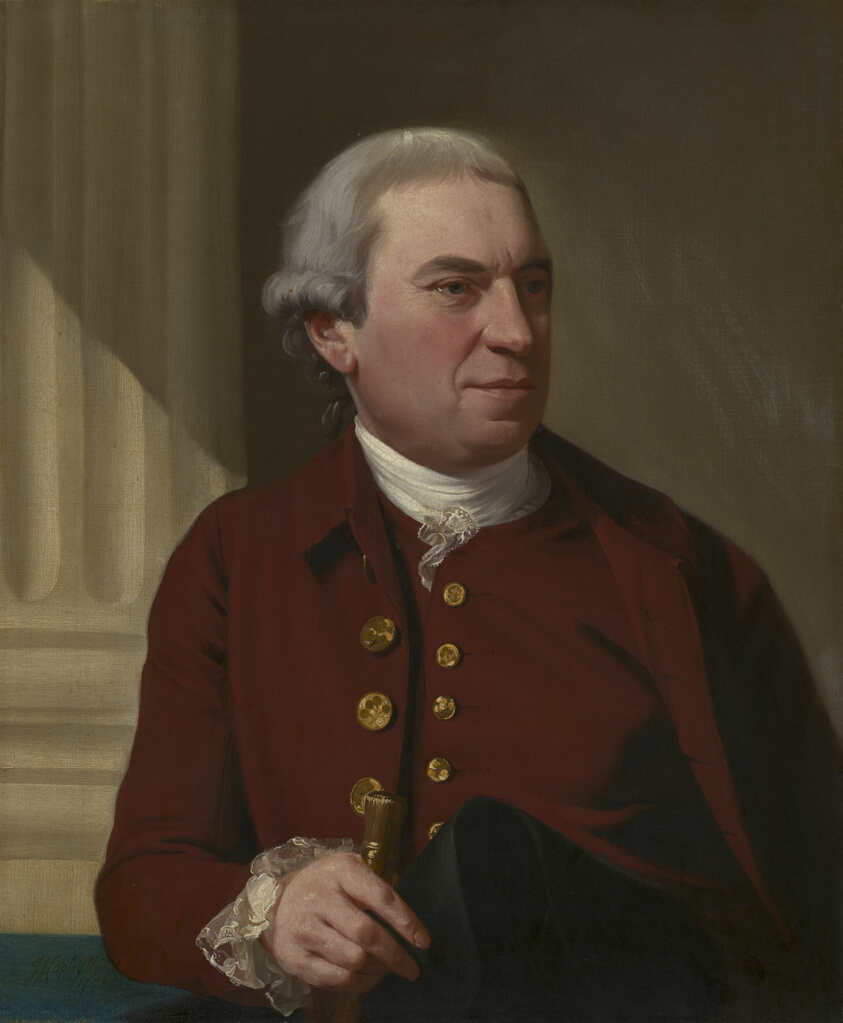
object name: Painting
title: Robert Hyde, Squire of Hyde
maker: John Singleton Copley (American, 1738–1815)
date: 1778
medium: Oil on canvas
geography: United States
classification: painting; american arts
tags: fashion, people, portraits